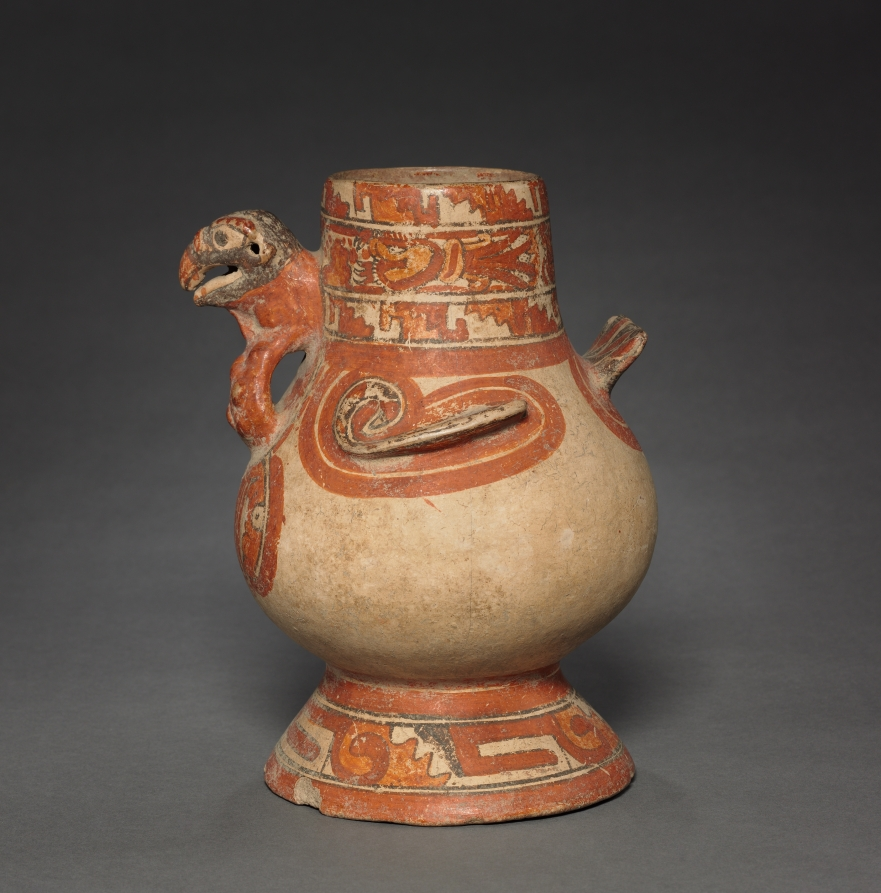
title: Turkey Vessel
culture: Costa Rica, Southern Nicoya region, Pataky Polychrome style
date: c. 1000–1550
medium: ceramic, slip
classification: Ceramic